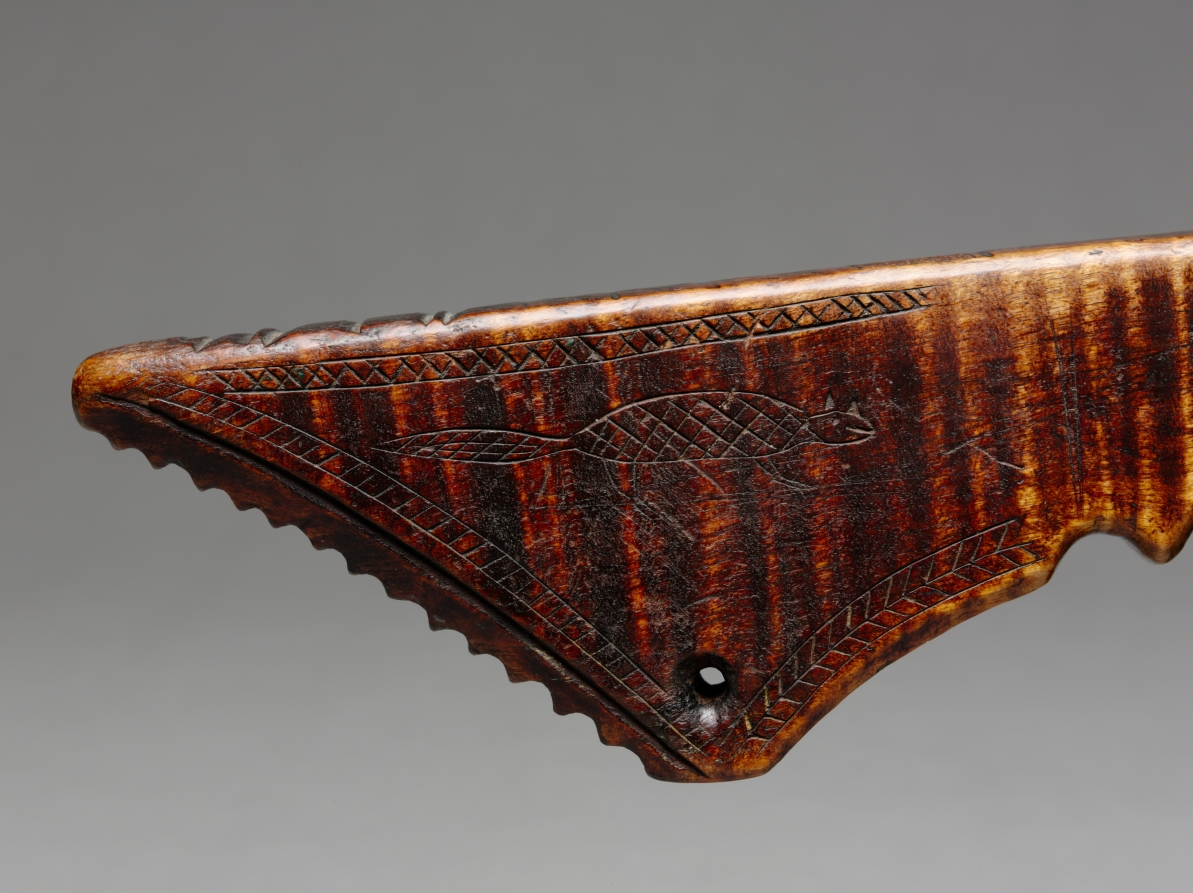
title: Ball-Headed War Club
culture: Native North America, Northeastern Woodlands, Great Lakes, Anishinaabe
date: late 1700s–early 1800s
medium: wood (maple?)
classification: Implements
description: The ball at the striking end of this club is clenched in an abstract, jawlike form that likely refers to a protector animal who endowed the owner with power. Incised on the shaft is a rich record of doodemag (singular, doodem, “totem”)—animals representing other-than-human progenitors from which Anishinaabe peoples trace their descent. (The Anishinaabeg, a group of related Great Lakes nations, include the Odawa, Ojibwe, Potawatomi, and others.) Included is an antlered creature, perhaps a caribou, along with mammals, birds, and powerful spirit beings: the thunderbird, its wings outstretched, and perhaps the long-tailed underwater panther. When this example was made, clubs had become symbols of status and earlier ways of life, having been replaced as favored weapons by metal tomahawks and European firearms. Today, clubs are part of powwow regalia.